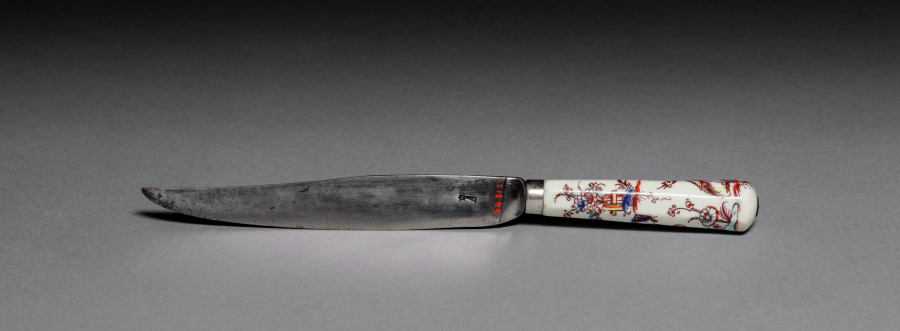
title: Knife Handle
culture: France, 18th century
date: 1725–1750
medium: soft paste porcelain, steel blade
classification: Ceramic